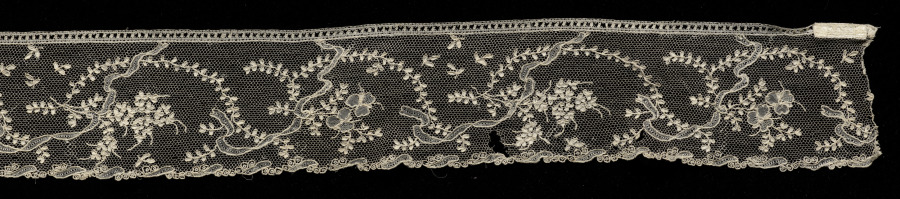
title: Lace Edging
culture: France, Alençon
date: 1740–60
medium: Needle lace (Point d'Alençon)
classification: Lace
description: With its flowing ribbon and garland pattern, this lace edging is from the late Louis 15th period or early Louis 16th period.